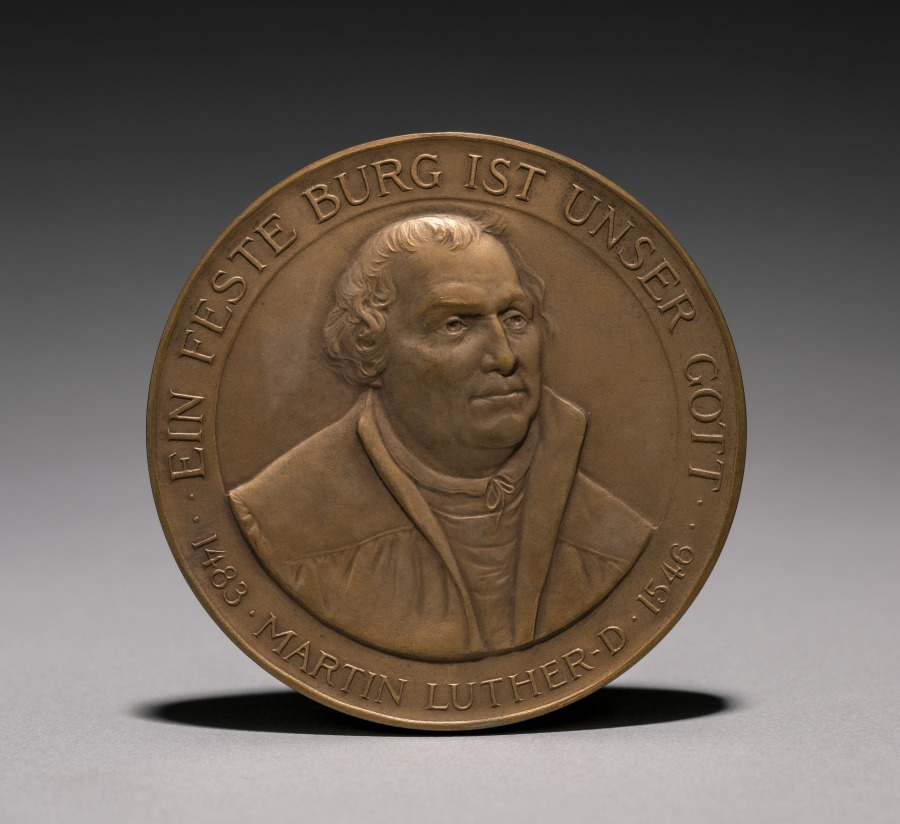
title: Medal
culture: America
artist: Jonathan M. Swanson (American, 1888–1963)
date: 1917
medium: bronze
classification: Metalwork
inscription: first line of Luther's hymn, "Ein feste Burg ist Unser Gott. 1483. Martin Luther. D. 1546."